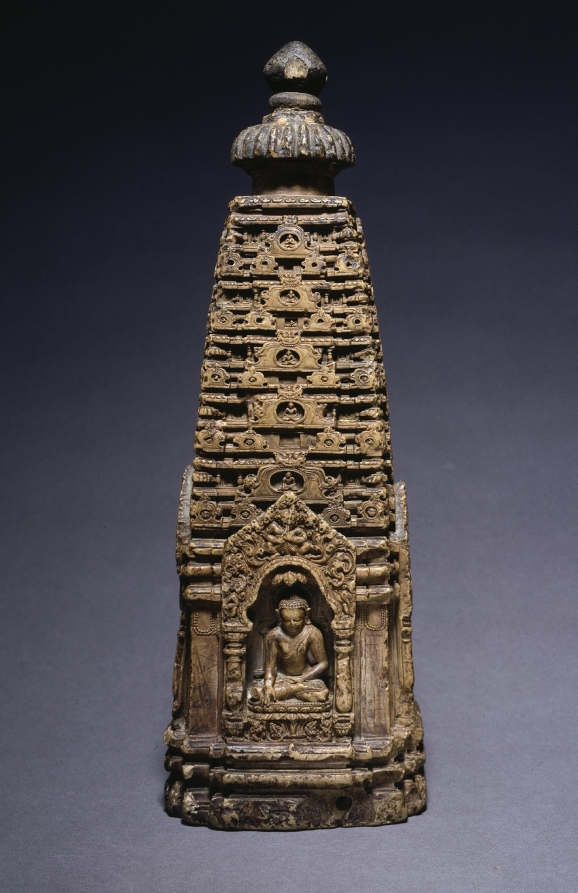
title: Portable Buddhist Temple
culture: Eastern India, Bihar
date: 900s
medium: Kaolin with traces of pigment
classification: Sculpture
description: The large niches on each side contain scenes from the life of the Buddha. The first features his mother Maya after his miraculous birth. The second and fourth depict his triumph over the forces of evil that attempted to frighten and seduce him away from the path to enlightenment. The third scene takes place after he has established a monastic following and depicts his wife bringing their son to meet him. Kaolinite is a compacted mineral that approximates ivory in its ability to be carved with fine details. Visitors to sacred Buddhist sites would commission portable sculptures such as this to commemorate their pious pilgrimage.